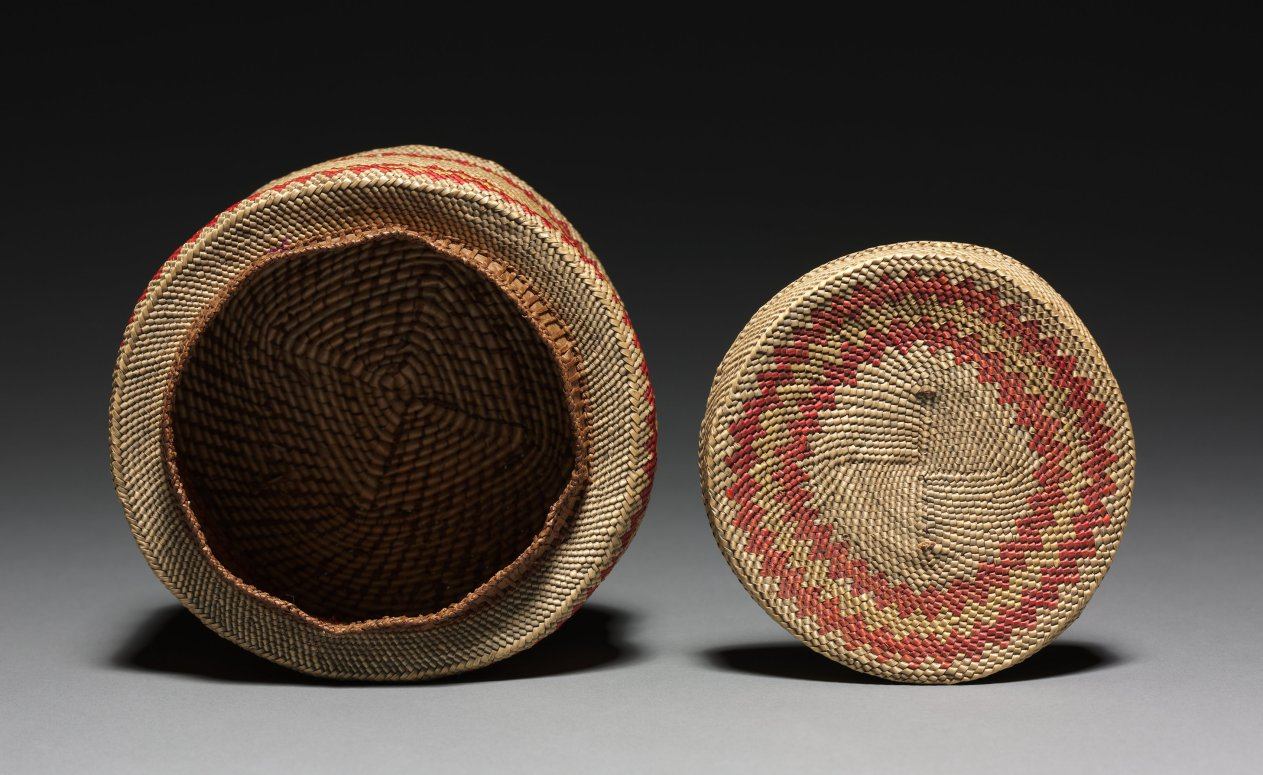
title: Ginger Jar- Shaped Basket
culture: Northwest Coast, Cape Flattery, Washington, Makah, late 19th-early 20th century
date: c 1900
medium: pear grass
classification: Basketry